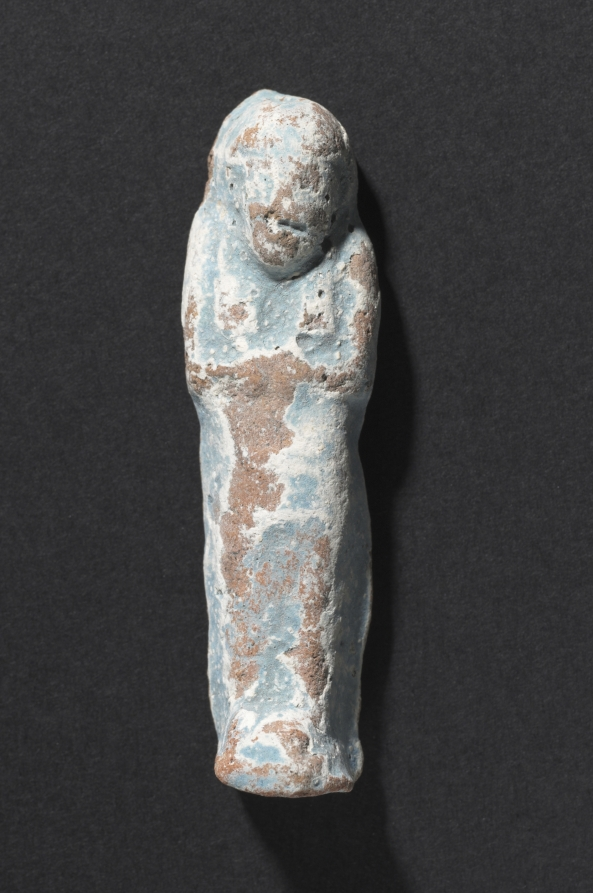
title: Shawabty of Ditamenpaankh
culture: Egypt, Late period (715–332 BCE), Dynasty 25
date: 715–656 BCE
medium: terracotta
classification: Funerary Equipment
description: High demand for shawabtys in the Late Period, a time when as many as 400 or more shawabtys were placed in the tomb with the deceased, gave rise to a specialized container for storing them: the shawabty box. This example is inscribed for the lady of the house, Ditamenpaankh, and was probably one of a pair originally made for her. The single-masted boat on the box's lid is perhaps an allusion to the pilgrimage of the deceased to the holy city of Abydos, the cult city of Osiris, king of the dead. The shawabtys inside are crude, mass-produced examples cast in an open mold. Made of terracotta, their blue paint imitates more costly shawabtys made of faience. As for the shawabty spell, it has been removed from its traditional location on the shawabty's front and relocated onto the sides of box, where it needed only to be written once, thus expediting production.